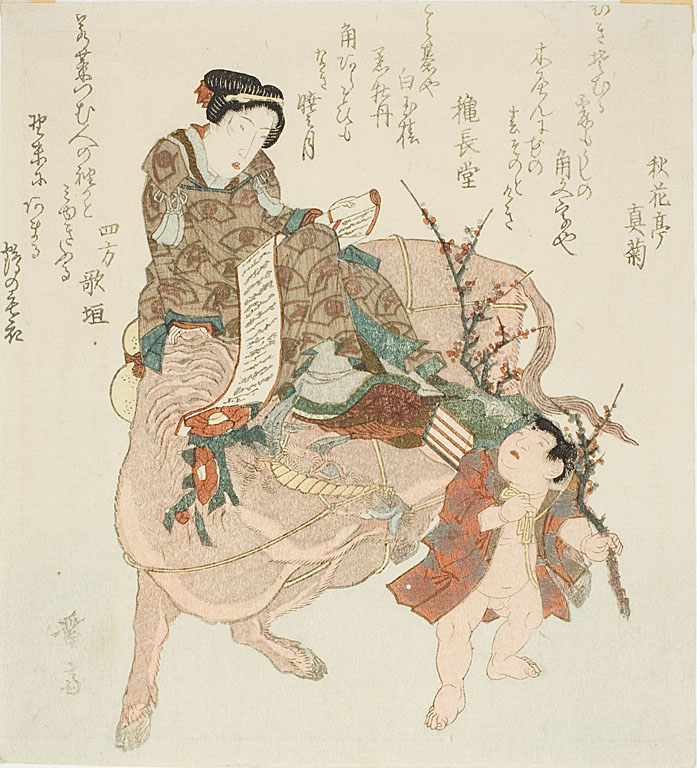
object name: Print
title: Girl Riding an Ox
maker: Keisai Eisen (Japanese, 1790–1848)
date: early 19th century (possibly 1829)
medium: Color woodblock print; surimono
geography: Japan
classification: woodblock print; print; asian art